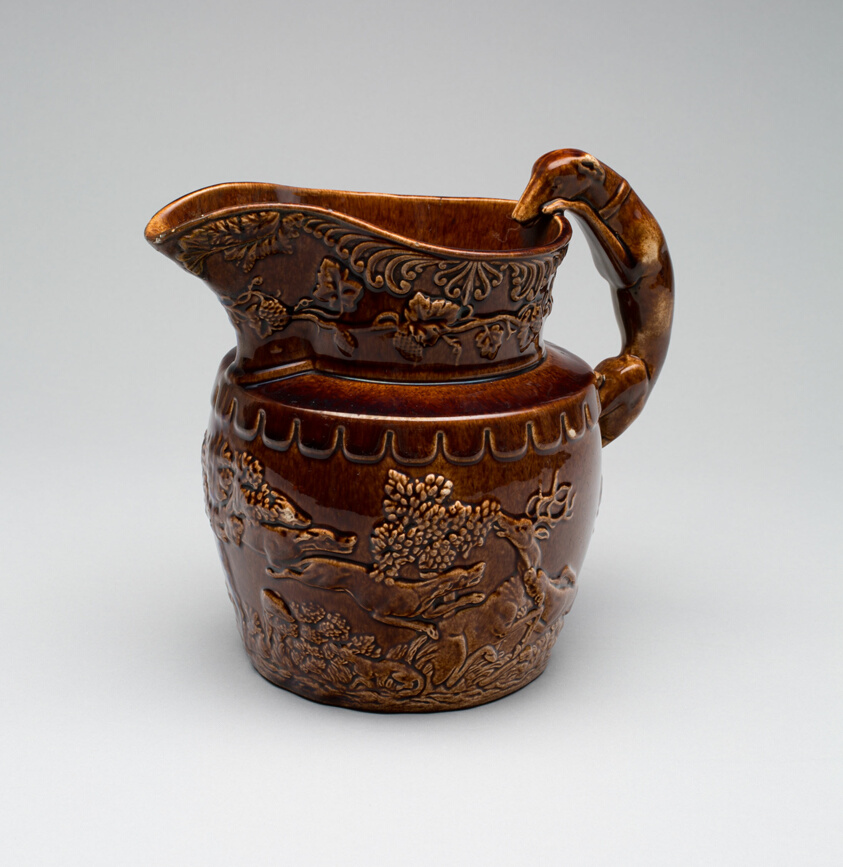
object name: Decorative Arts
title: Hound-Handled Pitcher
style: Folk Art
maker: Artist unknown (American, 19th century)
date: c. 1850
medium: Earthenware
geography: Bennington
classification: pitcher (vessel); vessel; american decorative arts; american arts; ceramics; decorative arts